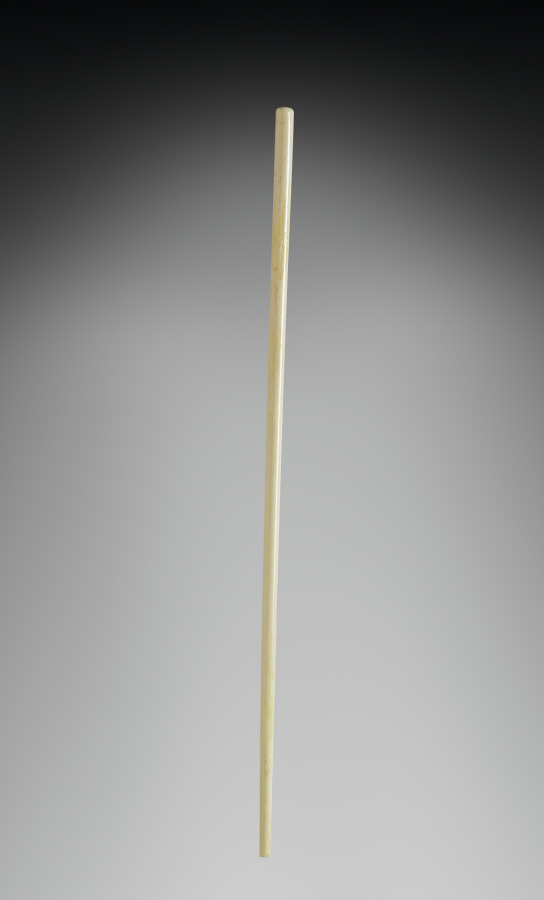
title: Chopstick for Chopstick and Knife Kit -Souvenir Trade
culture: Japan, Meiji period (1868–1912) to Taishō period (1912–26)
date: early 1900s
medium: emamel, wood, walrus ivory or bone, metal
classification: Implements